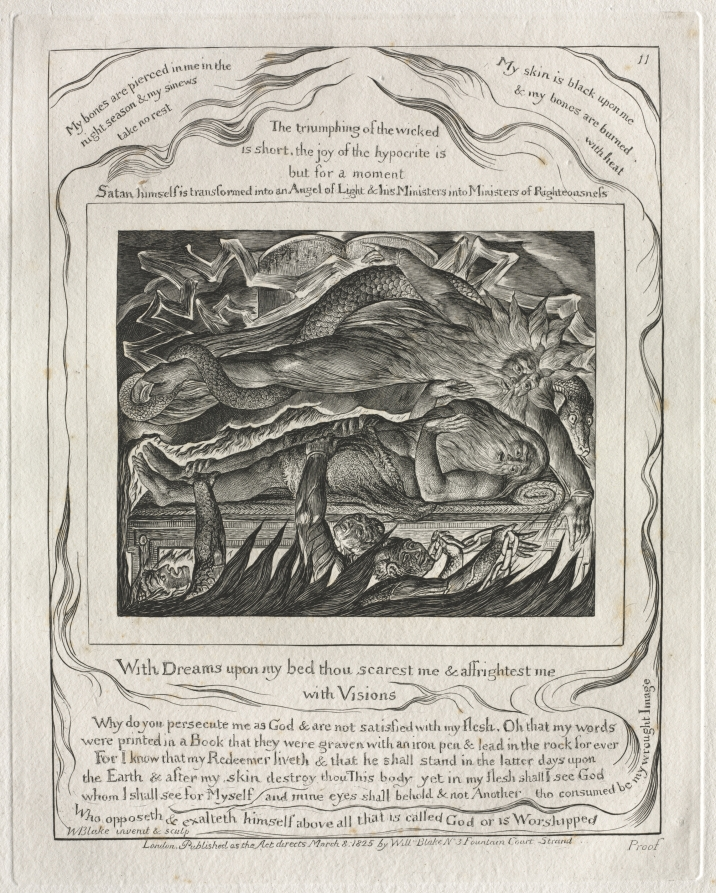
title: The Book of Job: Pl. 11, With Dreams upon my bed thou scarest me and affrightest me / with Visions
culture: England, 18th century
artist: William Blake (British, 1757–1827)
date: 1825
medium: engraving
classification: Portfolio